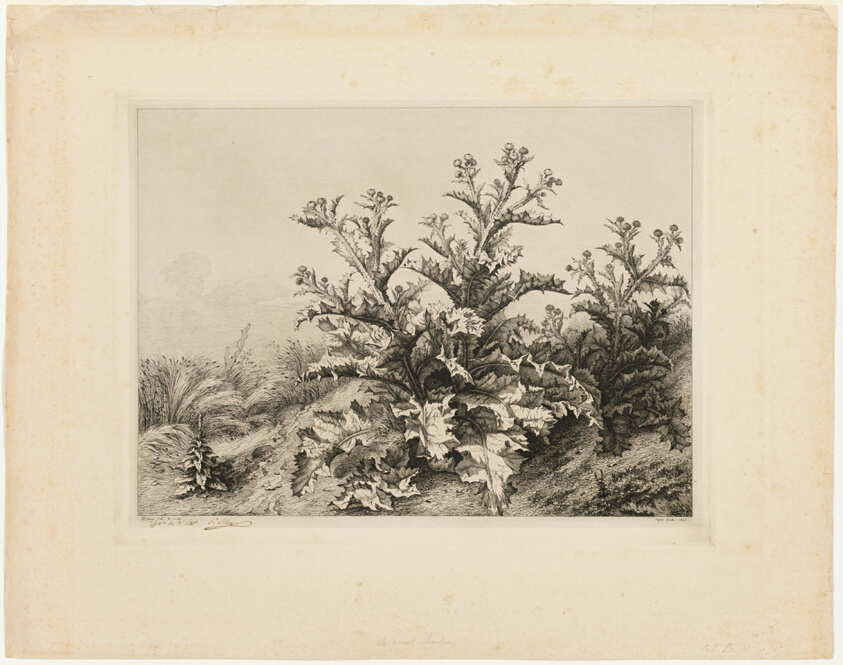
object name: Print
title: The Large Thistle, plate three from Les quatres grandes plantes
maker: Eugène Blery (French, 1805-1887)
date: 1843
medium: Etching, roulette, and drypoint on cream chine collé, laid down on cream wove paper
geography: France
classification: etching; print; prints and drawing